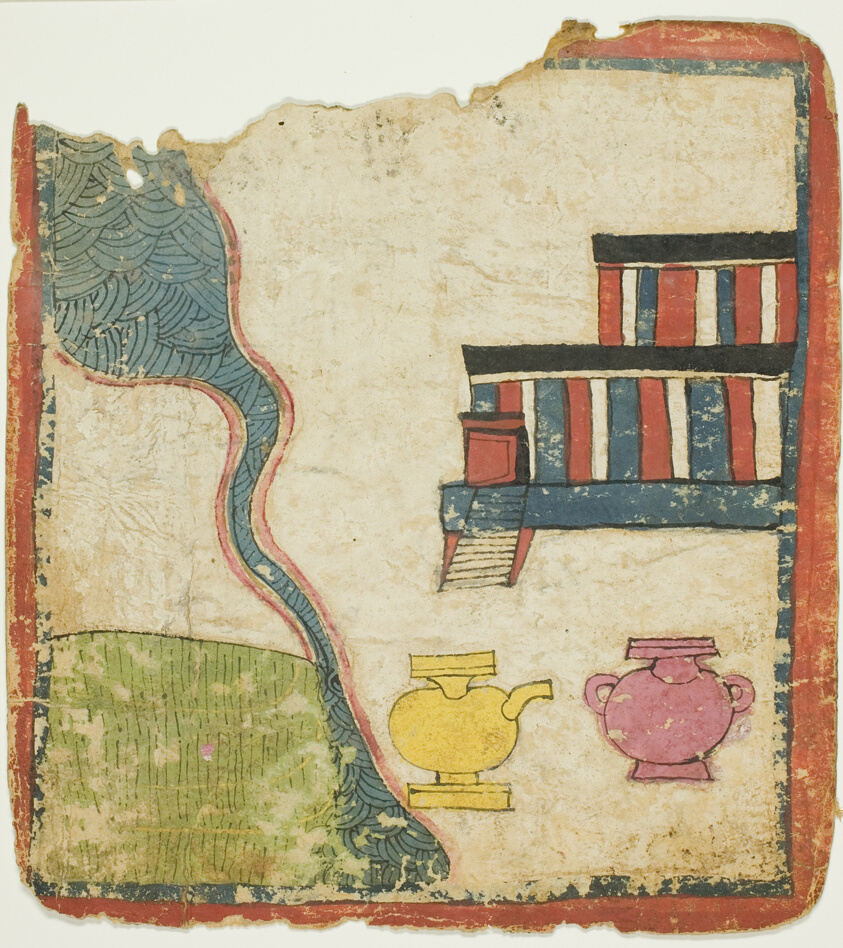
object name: Religious/Ritual Object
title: Image from a Set of Initiation Cards (Tsakali)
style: Himalayan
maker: Southern Tibet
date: 14th/15th century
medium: Ink and watercolor on paper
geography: Tibet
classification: ink; ritual objects